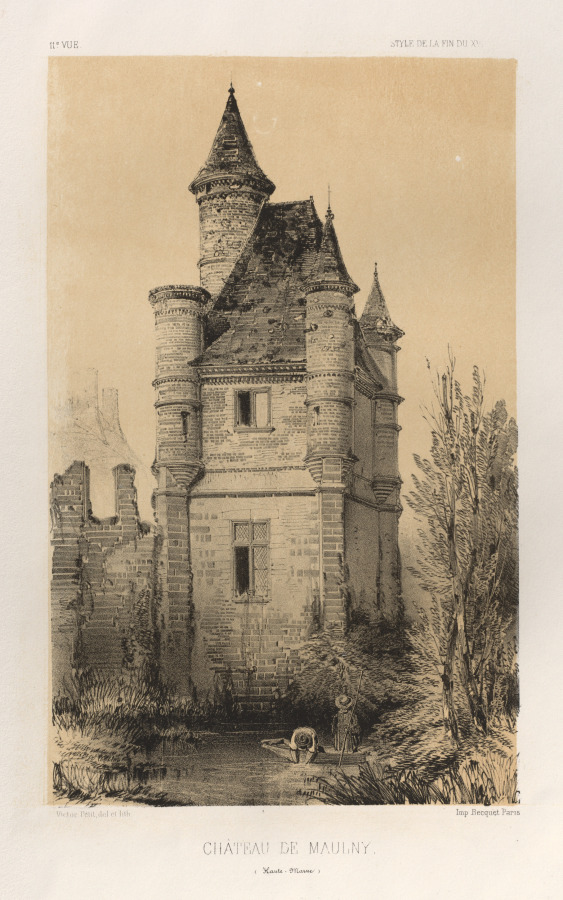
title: Architecture Pittoresque ou Monuments des xveme. Et xvieme. Siecles: Chateaux De France des XV et XVI Siecles: Pl.11, Chateau De Maulny (Haute-Marne)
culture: France, 19th century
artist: Victor Petit (French, 1817–1874)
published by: Charles Boivin (publisher and editor); Lith de Godard a Paris (printer)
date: 1860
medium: lithograph with tint stone, from portfolio of 100 lithographs with tint stone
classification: Print